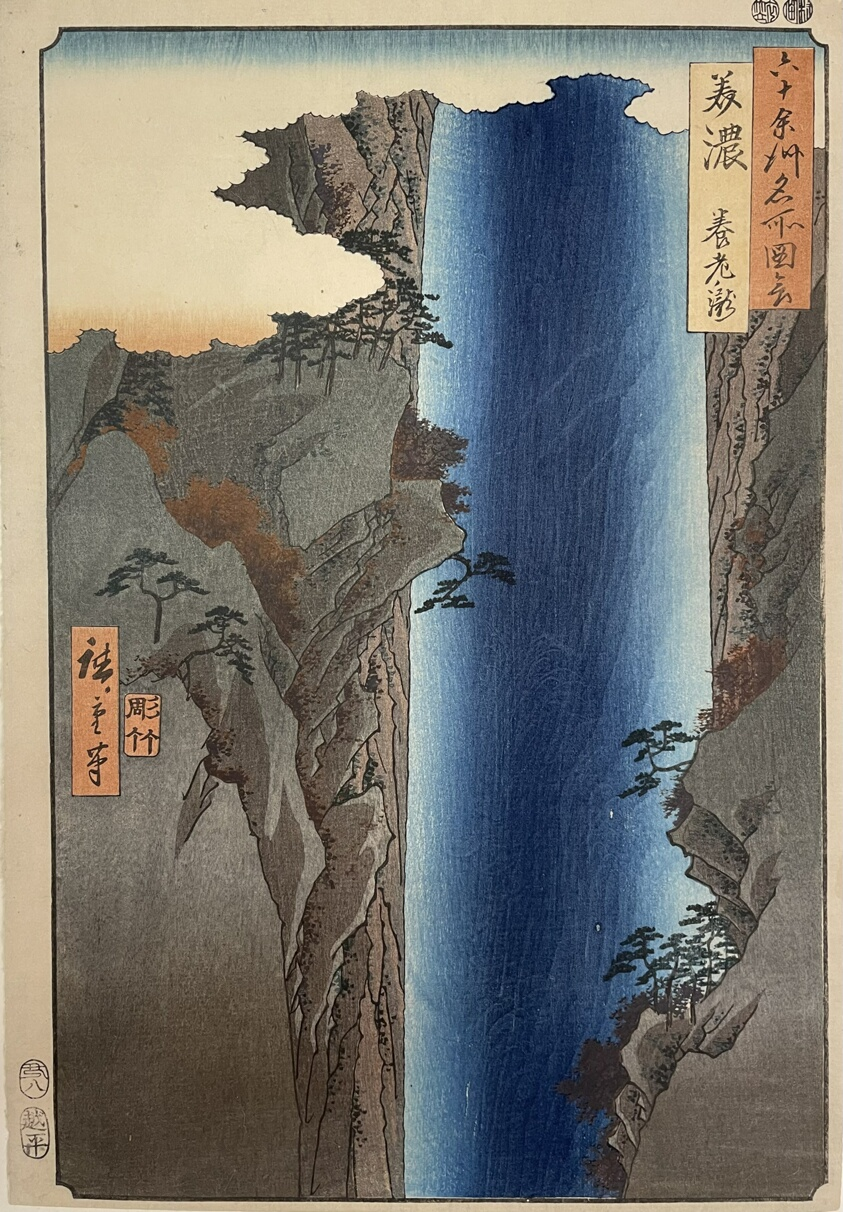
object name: Print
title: Mino Province: Yoro Waterfall (Mino, Yoro no taki), No.23 from the series "Famous Places in the Sixty-odd Provinces [of Japan] ([Dai Nihon)] Rokujuyoshu meisho zue)"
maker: Utagawa Hiroshige 歌川 広重; Japanese, 1797-1858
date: 1853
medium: Color woodblock print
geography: Japan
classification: woodblock print; print; asian art